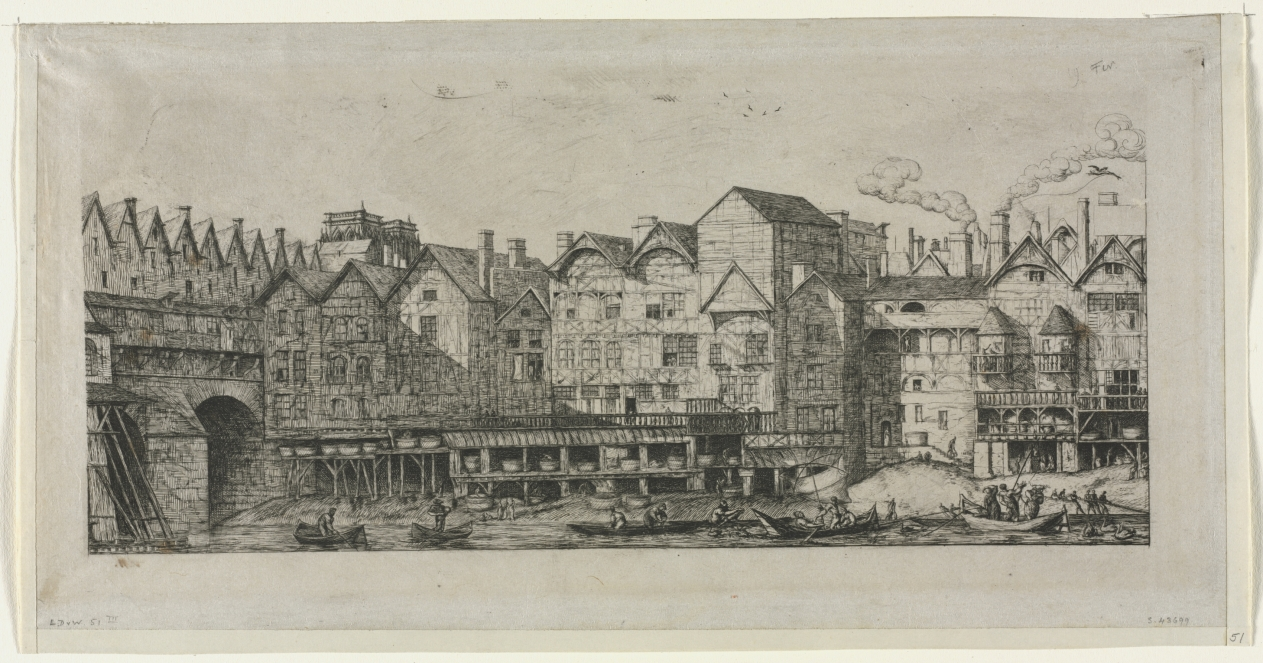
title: View of Part of the City of Paris Toward the Close of the 17th Century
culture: France, 19th century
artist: Charles Meryon (French, 1821–1868)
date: 1861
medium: etching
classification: Print